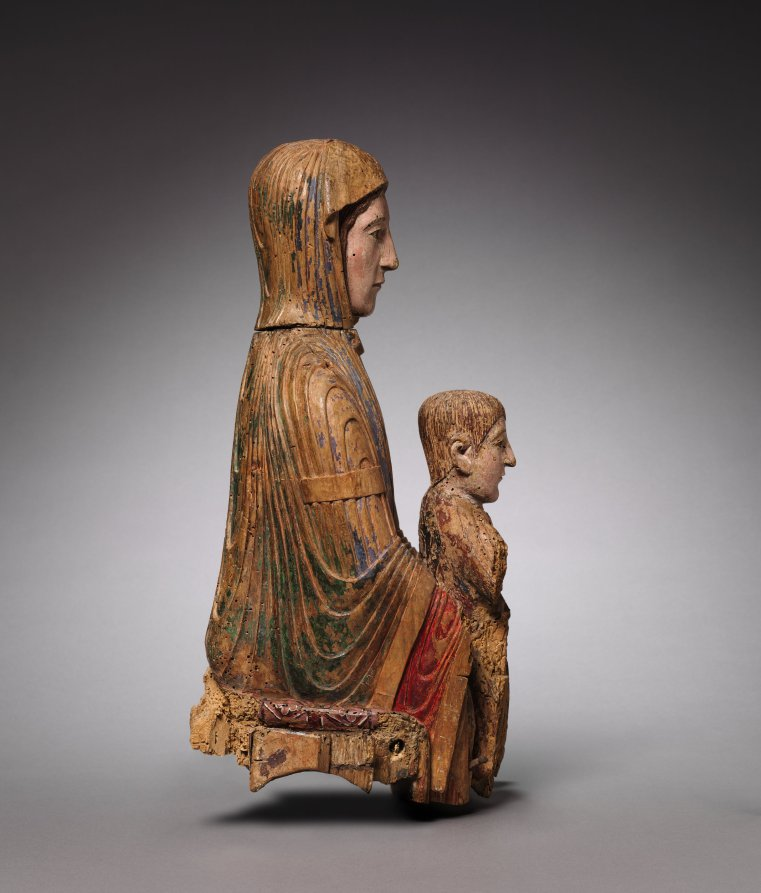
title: Virgin and Child in Majesty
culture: France, Auvergne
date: c. 1150–1200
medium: polychrome wood (walnut)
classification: Sculpture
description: This sculpture belongs to a group of early representations of the Virgin and Child known as the Sedes Sapientiae (the Throne of Wisdom). The subject embodies a complex and core Christian doctrine of the Virgin’s role in the Incarnation (the moment in which Christ became flesh) and ultimately in the redemption of humankind. Mary faces forward, her gaze toward the beholder. As she is seated on a throne, she in turn becomes the throne to the Christ child, thus symbolizing her role in giving birth not only to the human Jesus, but also to the divine Christ. The Incarnation gave Mary a unique role as principal mediator between heaven and earth, and between God and humankind. As a result, her image proliferated in art, especially after the 12th century, a period in which there was surging interest in Mary’s life and increasing devotion to her person and images. The sculpture belongs to a rare group of surviving figures produced in the Auvergne region of central France during the second half of the 12th century. These "Auvergne" Virgins are estimated to number only about 25 or 30 and are characterized by their linear, calligraphic draperies, which form beautiful swirls and contours. All such sculptures are smaller than life-size and made of wood in order to make them mobile. Evidence suggests that they were moved from altar to altar or church to church, and were frequently carried in procession within churches and town streets on Marian feast days. The heads were intentionally removable in order to "dress" them in costumes for such processions.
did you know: In this sculpture of Mary and Jesus, their heads are detachable.